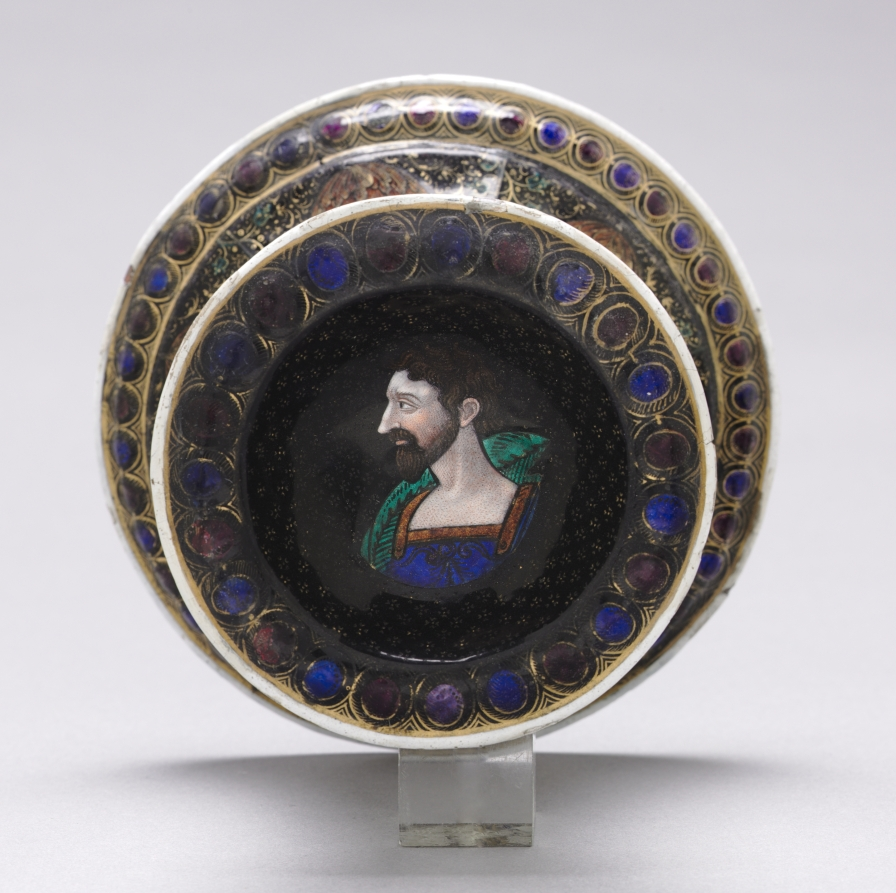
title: Salt Dish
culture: France, Limoges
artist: Jean Limousin (French, 1528–c. 1610)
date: early 1600s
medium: painted enamel on copper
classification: Ceramic